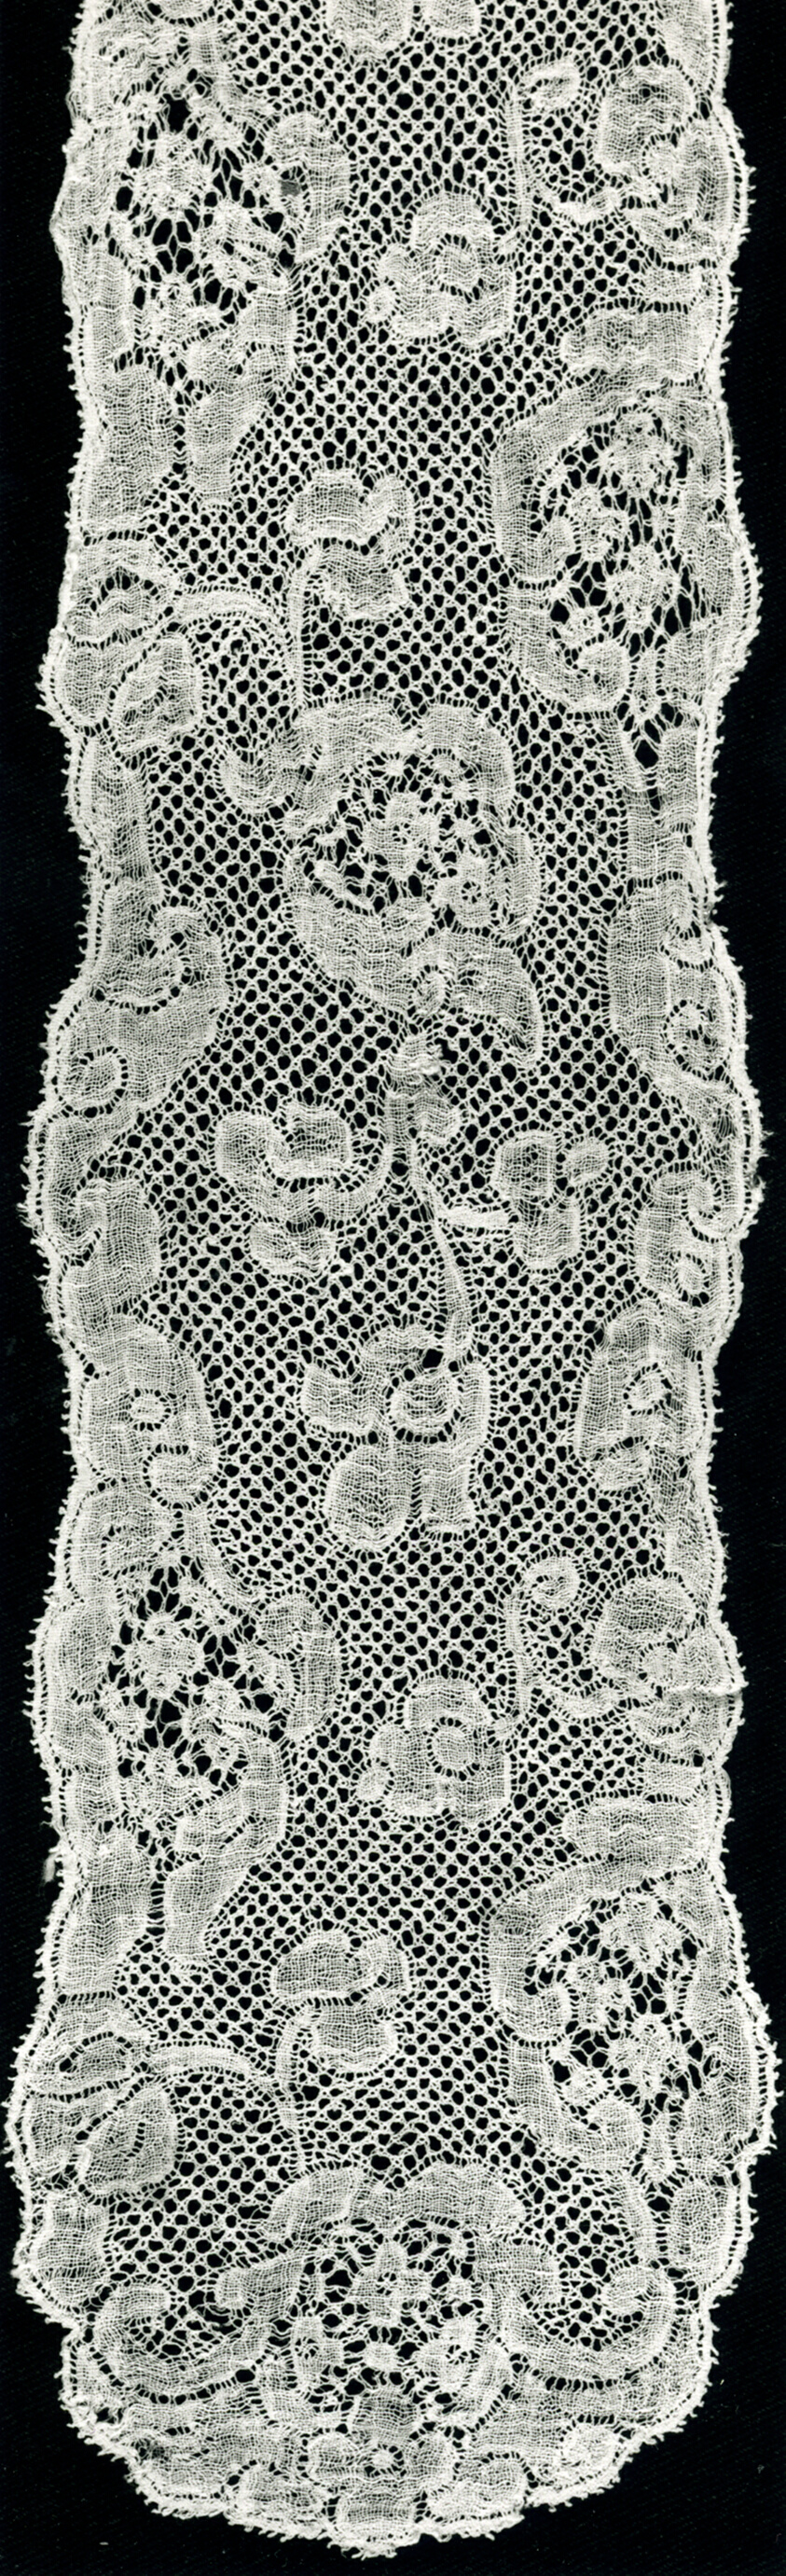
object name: Costume and Accessories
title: Lappet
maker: France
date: 1740s/50s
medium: Linen, bobbin straight lace of a type known as "Valenciennes" with a five hole mesh ground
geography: France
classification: costume accessory; lace - bobbin; textile; costume; costume accessory - headdress; costume accessory worn above the waist